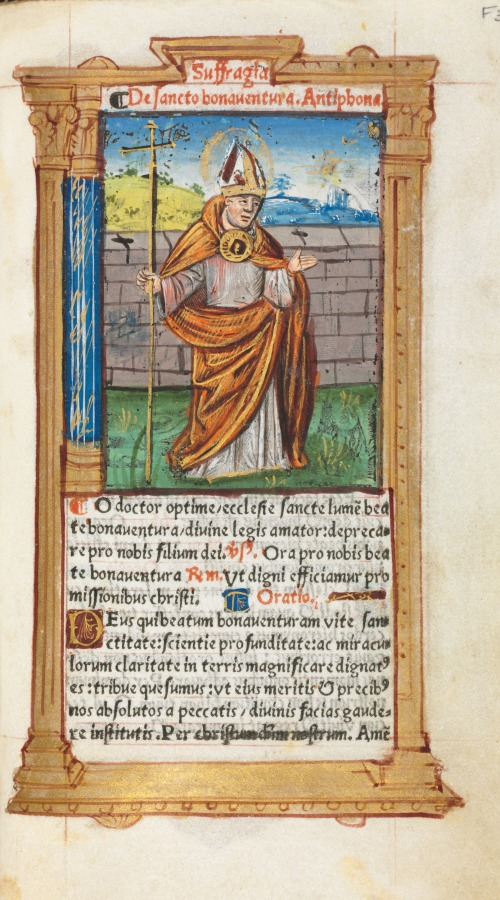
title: Printed Book of Hours (Use of Rome): fol. 107r, St. Bonaventura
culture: France, Paris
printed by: Guillaume Le Rouge (French, Paris, active 1493–1517)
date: 1510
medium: 112 Printed folios on parchment, bound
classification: Bound Volume